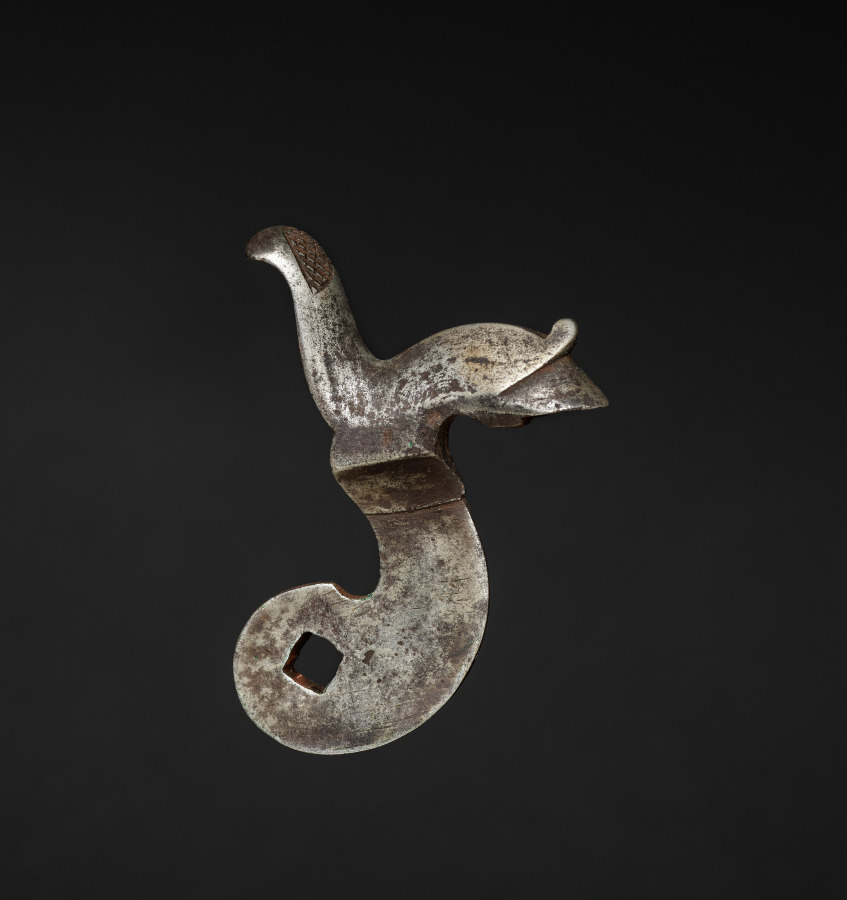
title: Gun-Lock Hammer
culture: England, early 19th century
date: c. 1800–1825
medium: steel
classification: Arms and Armor